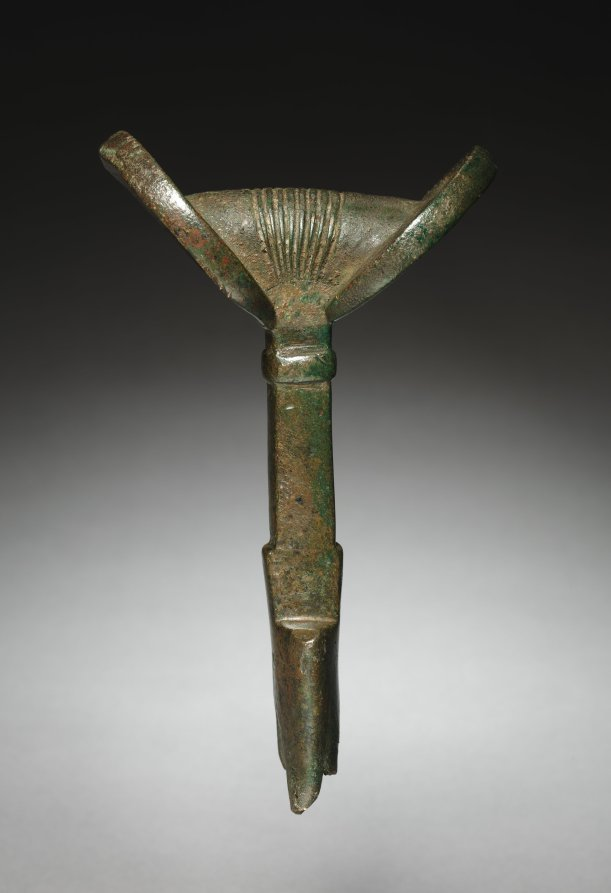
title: Sword Handle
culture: Iran, Luristan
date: 2000–1000 BCE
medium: bronze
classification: Metalwork